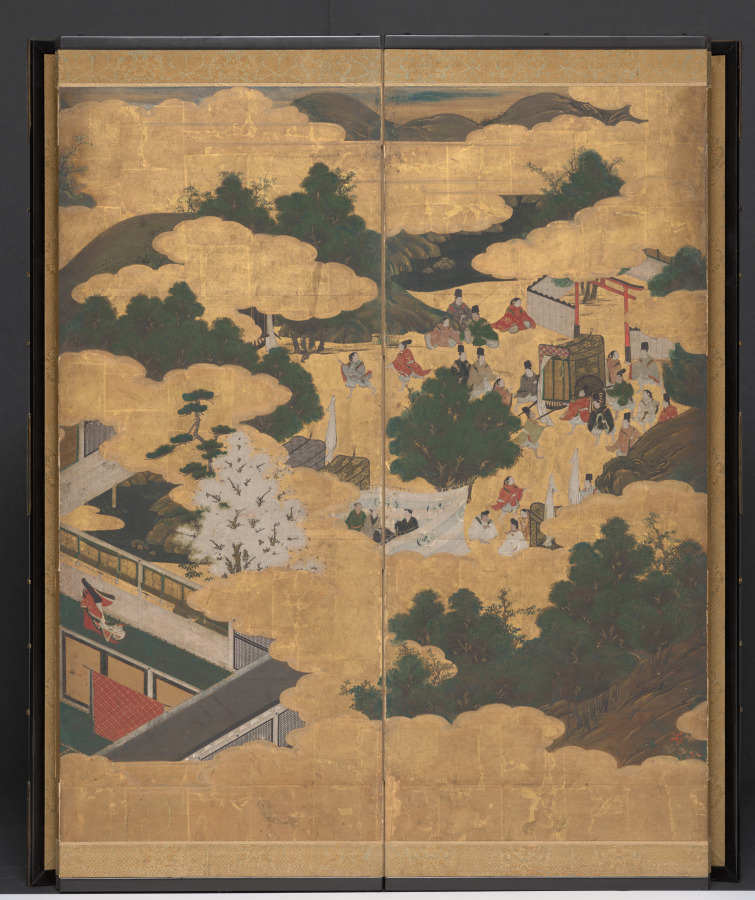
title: Scenes from the Tale of Genji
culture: Japan, Edo period (1615–1868)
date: 1700s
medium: Six-panel folding screen; ink, color, gold and gilding on paper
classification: Painting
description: Folding screens served as temporary dividers in traditional Japanese open-plan architectural spaces. This screen was inspired by Japan’s most celebrated work of literature, the Tale of Genji, written by Murasaki Shikibu, an attendant to the empress in the early 11th-century imperial court. The novel follows the love life of the “Shining Prince” Genji and delves into the psychological states of his many companions.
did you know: Distinct episodes are nestled within a matrix of golden clouds and landscape elements.